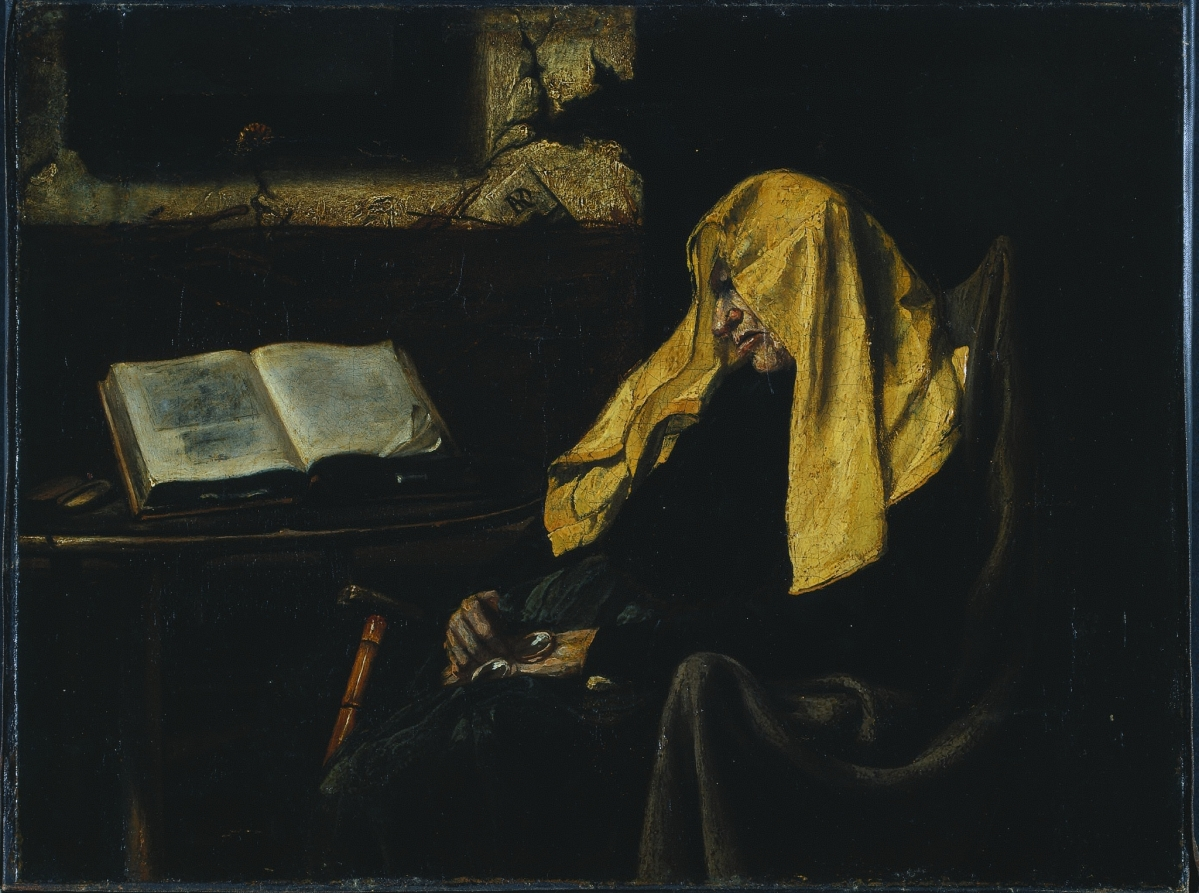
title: Old Woman Asleep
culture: possibly France, mid-19th Century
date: Mid 19th century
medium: oil on fabric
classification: Painting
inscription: Monogram on envelope at right edge of window sill: ard/f or rd/f